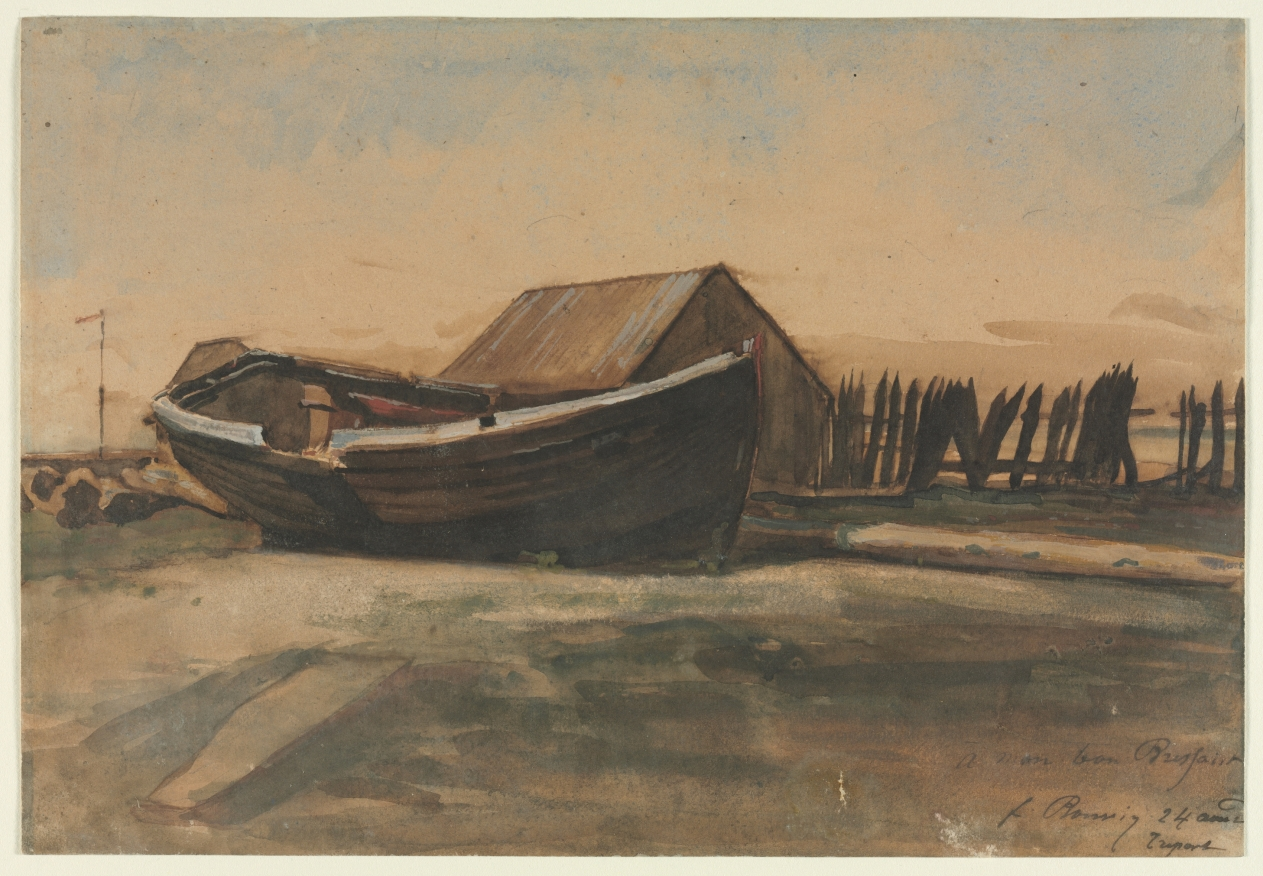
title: Boat on a Beach, Le Tréport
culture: France, 19th century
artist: François Bonvin (French, 1817–1887)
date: 1854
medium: watercolor and gouache over traces of graphite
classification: Drawing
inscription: signed, lower right, in brown ink: a mon bon Bressant / f. Bonvin 24 a[uot ?] / Treport ; VERSO, upper right, in graphite: M. Delestre F.